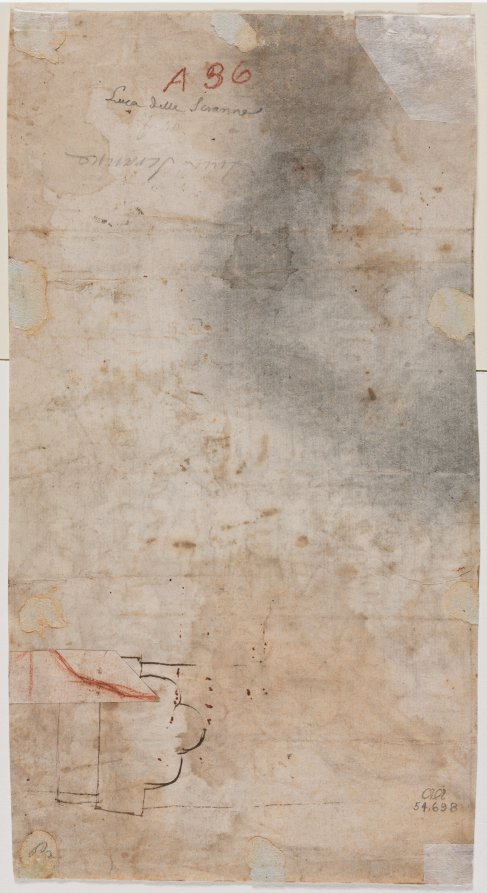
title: Architectural Sketch (verso)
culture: Italy, 16th century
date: 1500s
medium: pen and brown ink with red chalk (on separately applied piece of paper); pricked and pounced in left half (for an unrelated image)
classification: Drawing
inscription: center left, in brown-red crayon: A 36 [sideways] ; center left, in graphite Luca delle Scranne [sideways] ; center left, in graphite: forse [sideways] ; center left, in graphite: Luca Scranne [sideways] ; lower right, in graphite: [8°°?] [sideways]